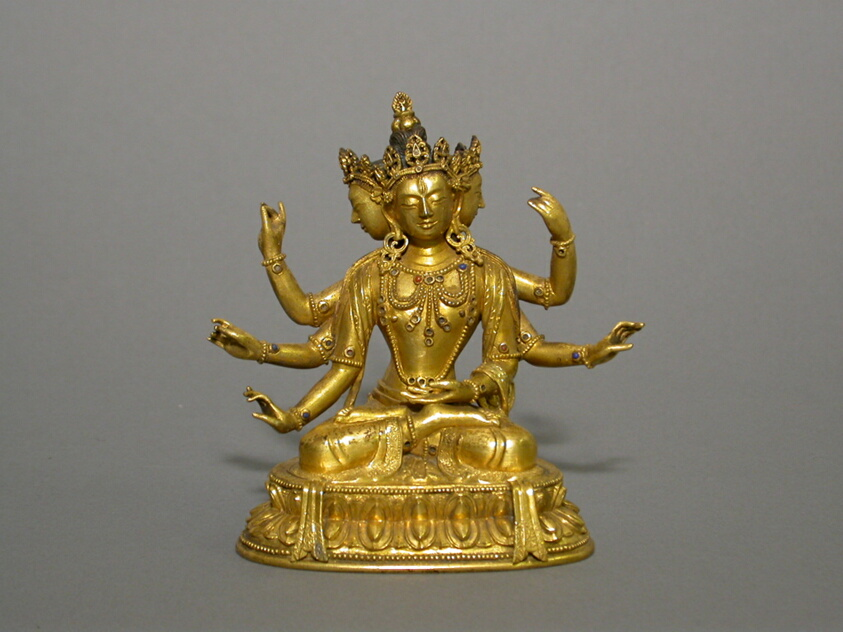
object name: Sculpture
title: Deity from a Set of Five Pancharaksha Goddesses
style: Chinese (culture or style), Himalayan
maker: China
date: Qing dynasty (1644–1911), 19th century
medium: Gilt copper alloy with lapis, coral and malachite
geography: China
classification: bronze; metal; sculpture; asian art